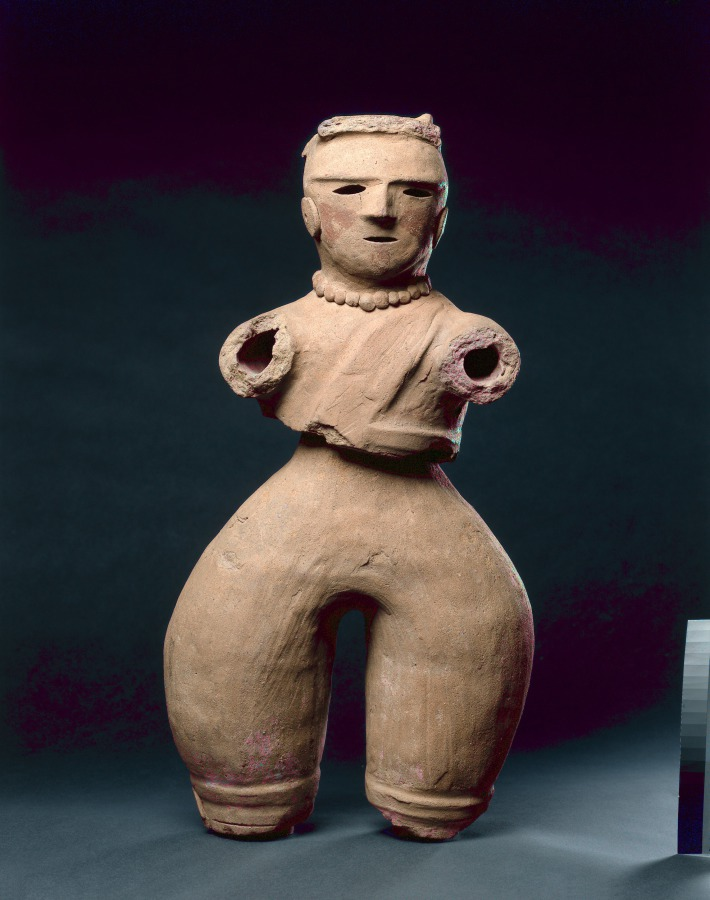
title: Haniwa Figure of a Female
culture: Japan, Kofun period (300–710 CE)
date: 500s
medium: earthenware with traces of pigment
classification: Sculpture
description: Figures in a variety of dress including military and ceremonial garb start to appear on Japanese earthen mounded tombs called old mounds (kofun) from the 400s to 500s CE. This fragment depicts a woman with red triangles on her face and wearing jewelry. Archaeologists speculate that the facial markings had a ritual or symbolic function, perhaps indicating she is a female shaman. Many figures of this kind have been found in digs in the Kanto region of eastern Japan. We can only guess at the meaning of the clay cylinders called haniwa.